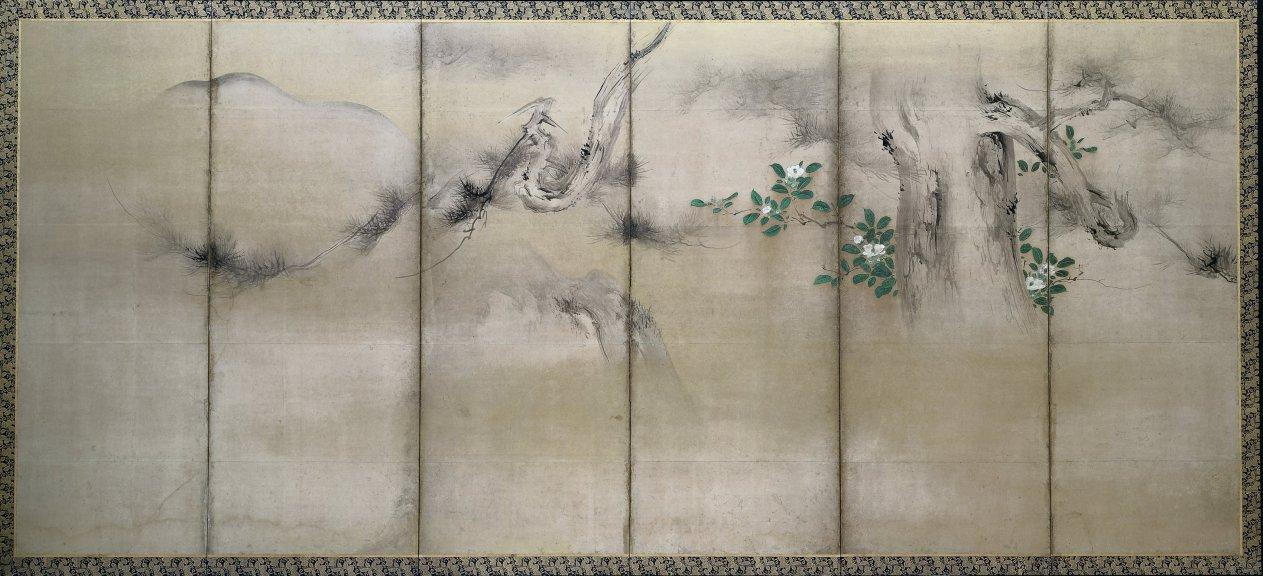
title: Winter and Summer Flowers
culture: Japan, Momoyama period (1573–1615)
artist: Kaihō Yūshō (Japanese, 1533–1615)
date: c. 1600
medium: One of a pair of six-panel folding screens; ink, color, and gold on paper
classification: Painting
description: White camellias bloom behind a large pine in the right screen and blue morning glories creep through bamboo in the left screen of this composition. The mountains and bridge suggest a continuous landscape, but the paintings actually juxtapose flowers of winter and summer, with time progressing from right to left. Kaihō Yūshō painted similar landscapes for Zen temples in Kyoto.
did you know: The pine and bamboo are defined by ink wash, but the flowers take form through color within contour lines.